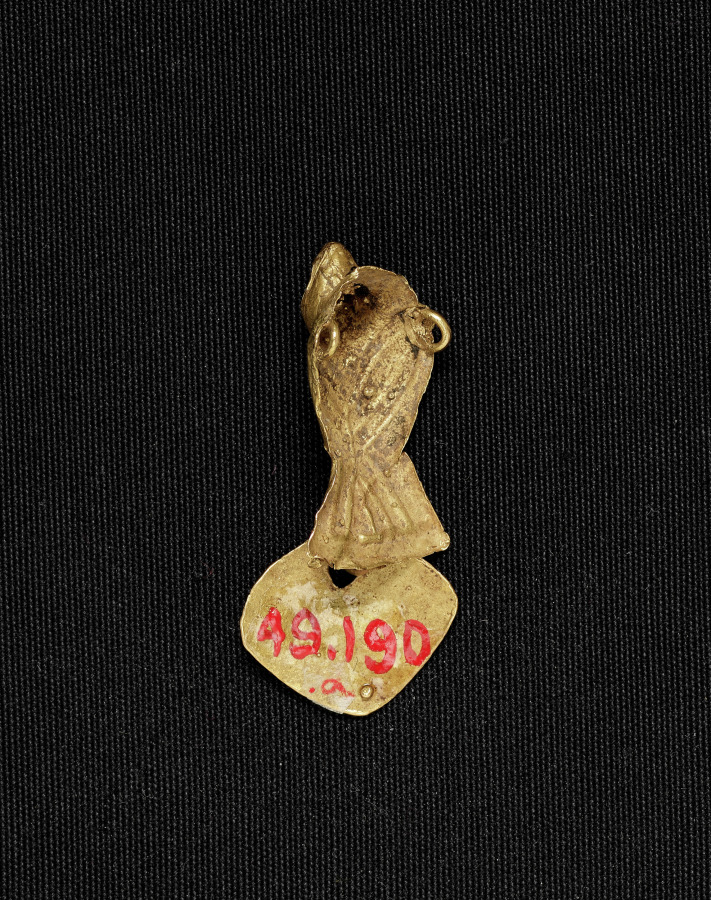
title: Bird Bead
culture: Colombia, Muisca style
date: c. 900–1550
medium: cast gold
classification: Jewelry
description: Muisca metalwork divides into two categories: ornaments to be worn, such as these, and offering figurines, in the case to the right. The elaborate bird pendant features delicate herringbone moldings, openwork patterns, and wing details-all part of the wax model from which the pendant was cast (see nearby computer animation). The dangles were attached after casting.